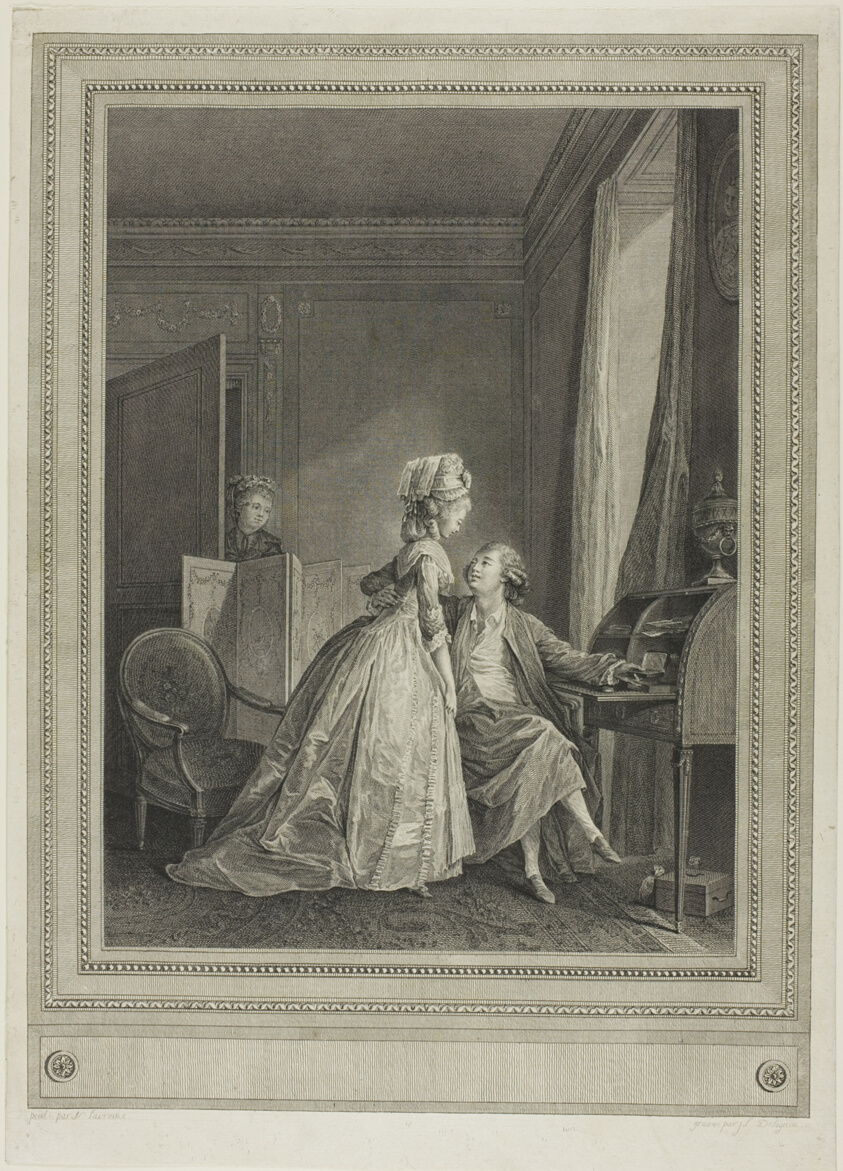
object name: Print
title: Tempting Offers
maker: Jean Louis Delignon (French, 1755-1804); after Nicolas Lavreince (Swedish, 1737-1807)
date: 1782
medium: Engraving and etching on ivory laid paper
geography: France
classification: etching; print; prints and drawing